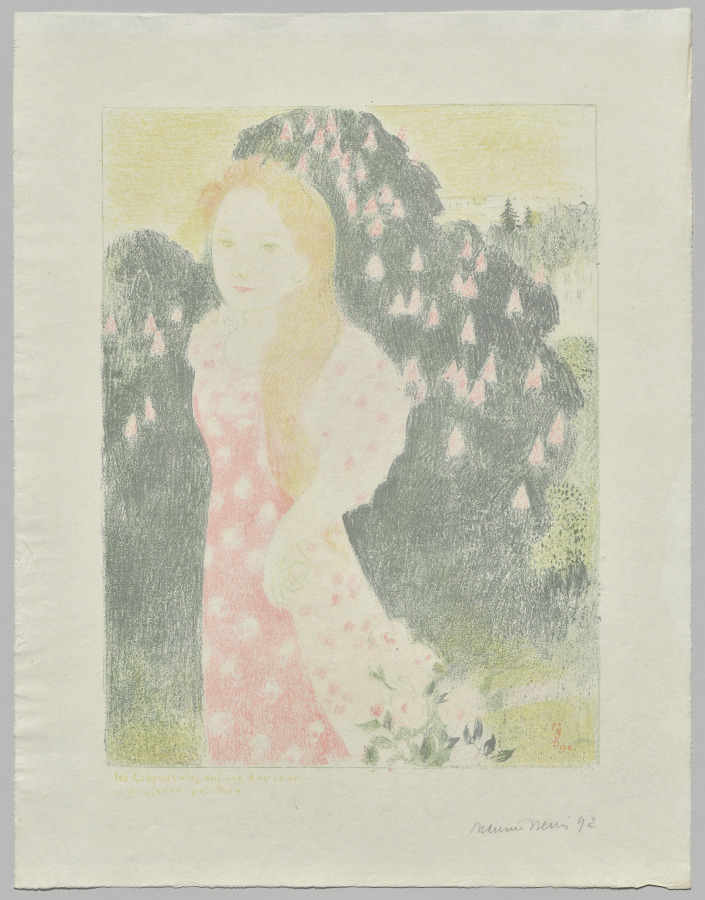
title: Twilights Have the Softness of Old Paintings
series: Love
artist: Maurice Denis (French, 1870–1943)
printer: August Clot (French, 1858–1936)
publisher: Ambroise Vollard (French, 1867–1939)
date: 1899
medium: color lithograph on wove paper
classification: Print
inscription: Recto, lower left: “les Crépuscules on tune douceur/d’ancienne Peinture”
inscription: In graphite, recto, lower right: “Maurice Denis 92 (?) (signed)”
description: Maurice Denis belonged to the Nabis, a group of artists who came together in 1889 to pursue a radical new style informed by subjective experience and emotion. This print is from a series in which Denis explored his devotion to his wife, Marthe, by depicting her in a variety of settings alongside titles drawn from his own journal. The vague but evocative images were meant to encourage the viewer to draw connections to the theme and meditate on its meaning.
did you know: Maurice Denis was a devout Catholic and often drew visual connections between his wife, Marthe, the subject of this print series, and the Virgin Mary.